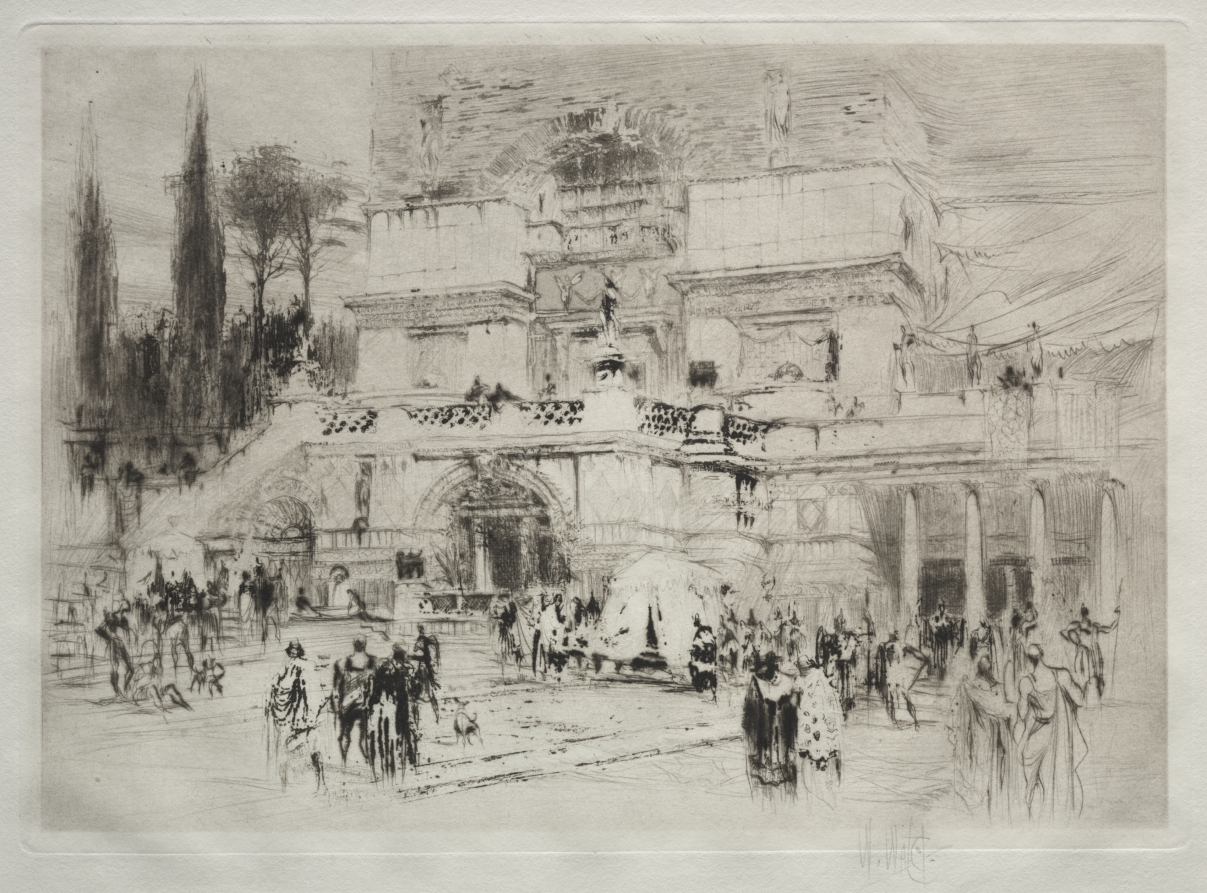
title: The Villa Quintillii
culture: England, 20th century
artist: William Walcot (British, 1874–1943)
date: 1921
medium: etching and drypoint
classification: Print